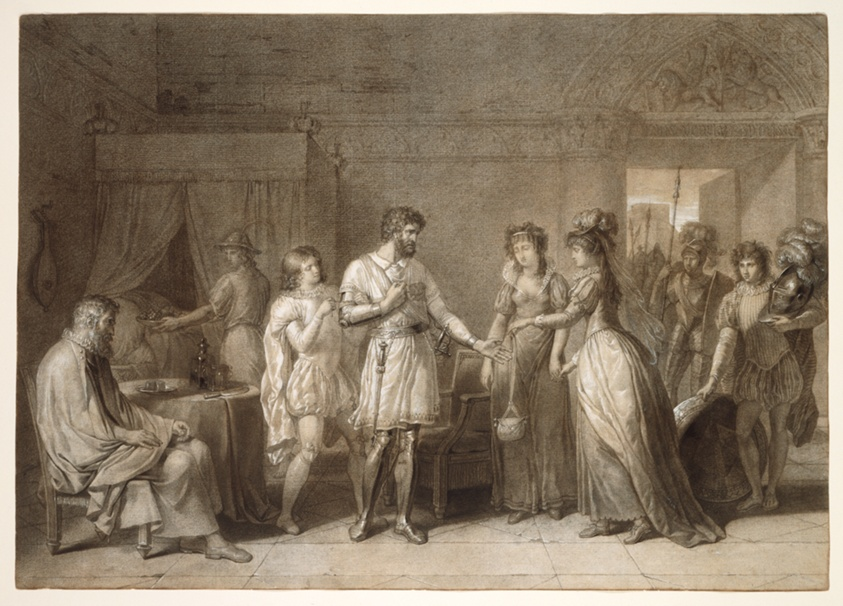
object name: Drawing and Watercolor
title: Bayard Refusing the Presents of His Hostess, in Brescia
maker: Anne-Louis Girodet de Roucy-Trioson; French, 1767-1824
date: c. 1789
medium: Black and brown chalk, with stumping, and pen and brown ink, heightened with white goauche, on off-white laid paper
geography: France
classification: chalk; drawings (visual works); prints and drawing